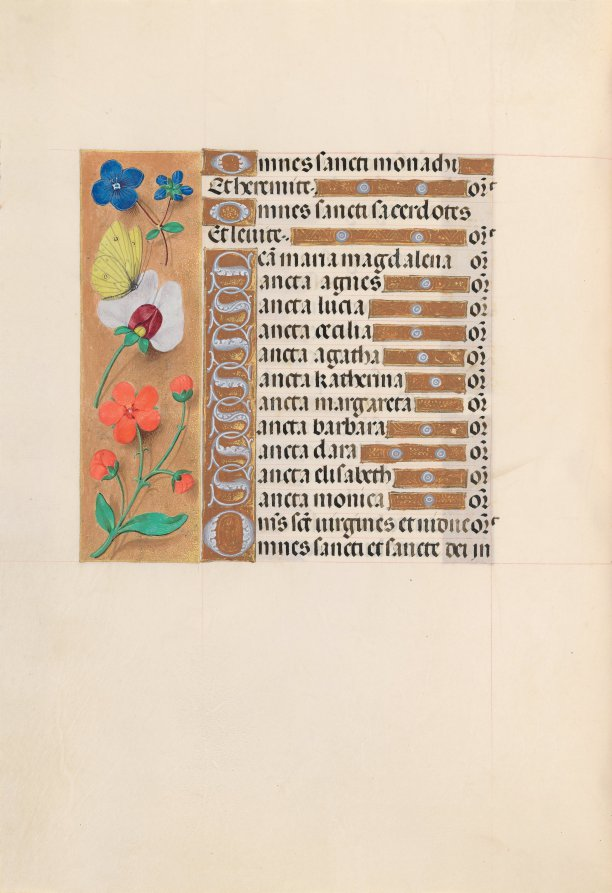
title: Hours of Queen Isabella the Catholic, Queen of Spain: Fol. 212v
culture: Flanders, Ghent and Bruges, late 15th century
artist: Master of the First Prayerbook of Maximillian (Flemish, c. 1444–1519)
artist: and Associates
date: c. 1500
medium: ink, tempera, and gold on vellum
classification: Bound Volume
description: This manuscript was illuminated by a circle of at least five highly organized manuscript painters active in the Flemish cities of Ghent and Bruges. The principal illuminator was Alexander Bening, who painted the majority of the book's miniatures. Manuscripts produced by this circle of artists are renowned for the decoration of their borders, which typically feature a rich variety of realistically-painted flowers, birds, and butterflies. This prayer book, called a book of hours, was intended not for a cleric, but for the private devotions of a lay person-in this case, Isabella the Catholic, Queen of Spain (1451-1504). Isabella's coat of arms embellishes the book's frontispiece. It is unlikely that the book was commissioned by the Queen herself; rather, she probably received it as a diplomatic gift from someone courting her patronage, perhaps Cardinal Francisco Jimenez de Cisneros. A Franciscan friar, Jimenez was dependent upon Isabella for his advancement, first to the post of Queen's confessor in 1492, and then to Archbishop of Toledo in 1495.